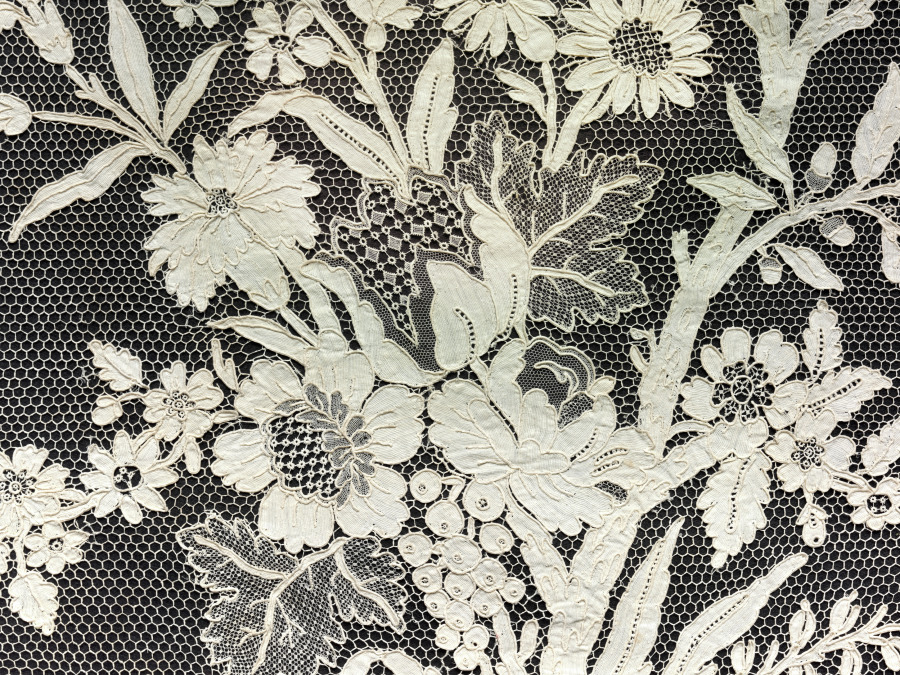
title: Fragment of Lace Flounce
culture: France, Argentan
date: 1740–60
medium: Linen: needle lace (Point d'Argentan)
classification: Lace